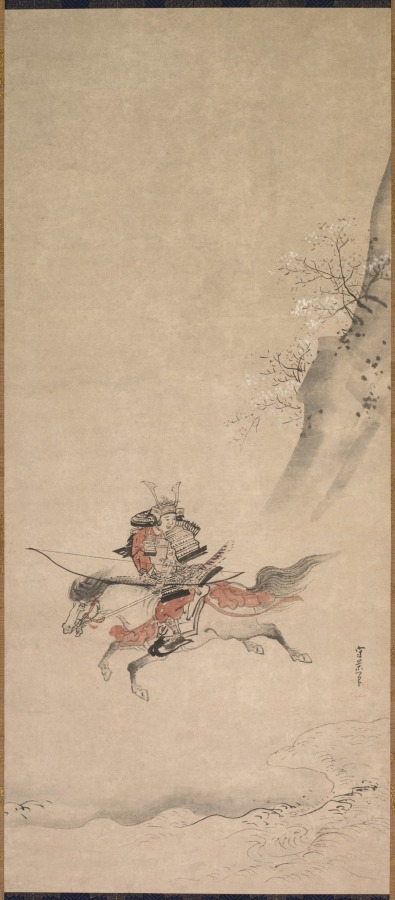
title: A Samurai on Horseback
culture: Japan, Edo period (1615–1868)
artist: Kusumi Morikage (Japanese, active c. 1620–1690)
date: mid- to late 1600s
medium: hanging scroll; ink and slight color on paper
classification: Painting